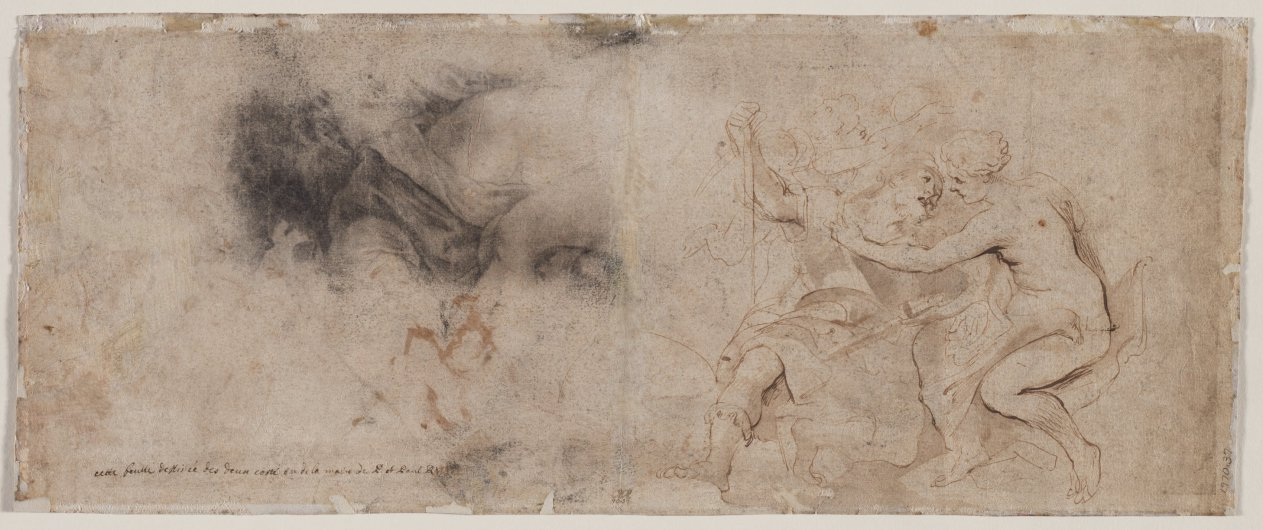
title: Venus Disarming Mars, Drapery Study (verso)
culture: Flanders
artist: Peter Paul Rubens (Flemish, 1577–1640)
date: c. 1632/35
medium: pen and brown ink and brush and brown wash (right half); black chalk, with stumping (left half)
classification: Drawing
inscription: lower left, in brown ink: cette feuille dessinnée des deux costé [est?] de la main de Piet Paul R[ubens]